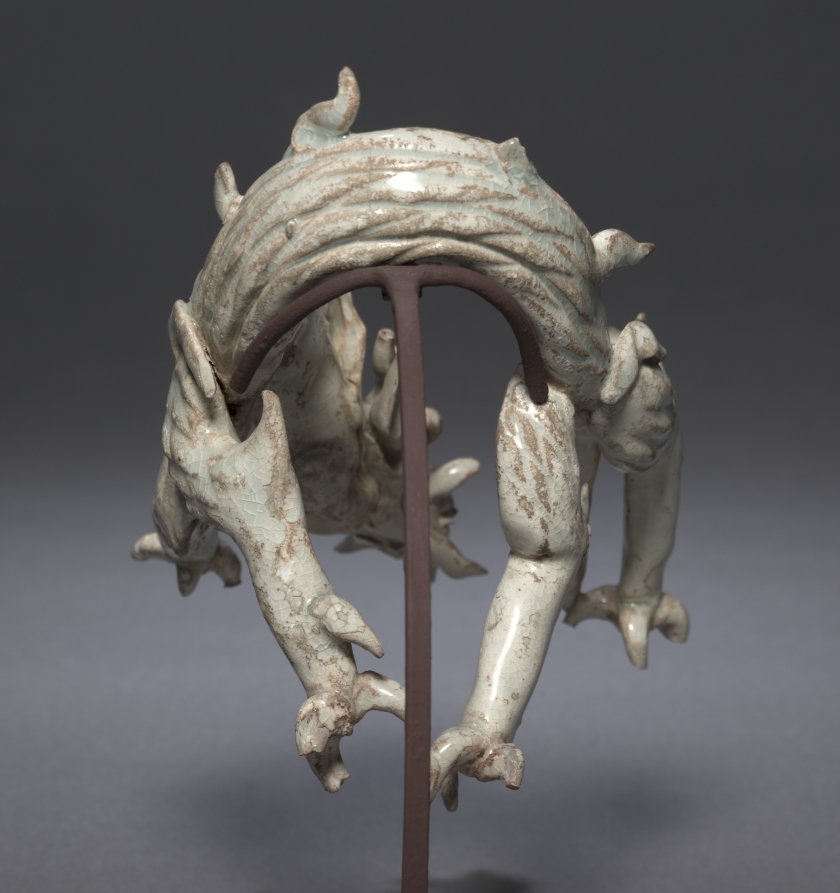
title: Dragon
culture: China, Southern Song Dynasty (1127-1279) - Yuan Dynasty (1271-1368)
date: 1127–1368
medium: glazed porcelain, qingbai ("blue-white") ware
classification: Ceramic